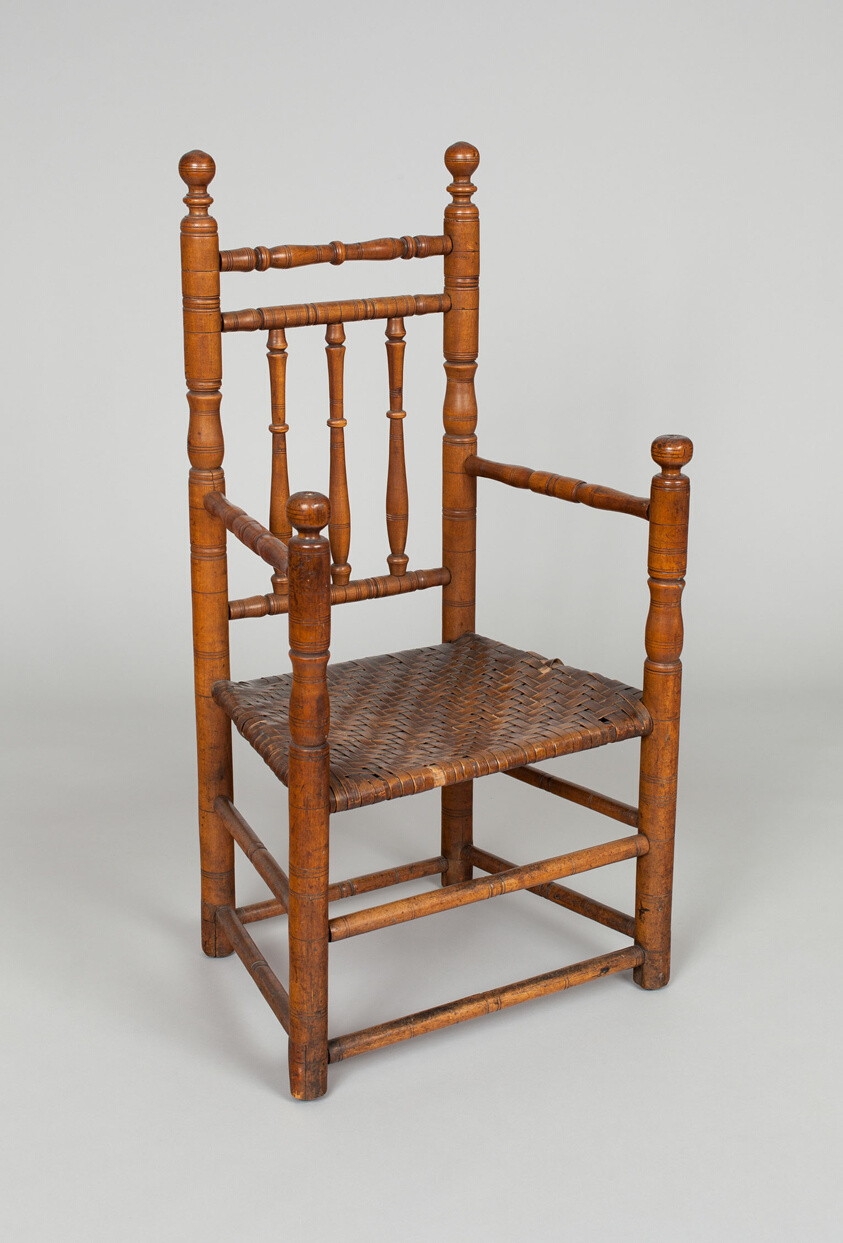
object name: Furniture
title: Armchair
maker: Artist unknown (American, active 17th–18th century); Coastal Connecticut or Long Island, New York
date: 1680–1710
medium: Ash or maple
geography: Connecticut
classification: seating; furniture; american decorative arts; american arts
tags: furniture